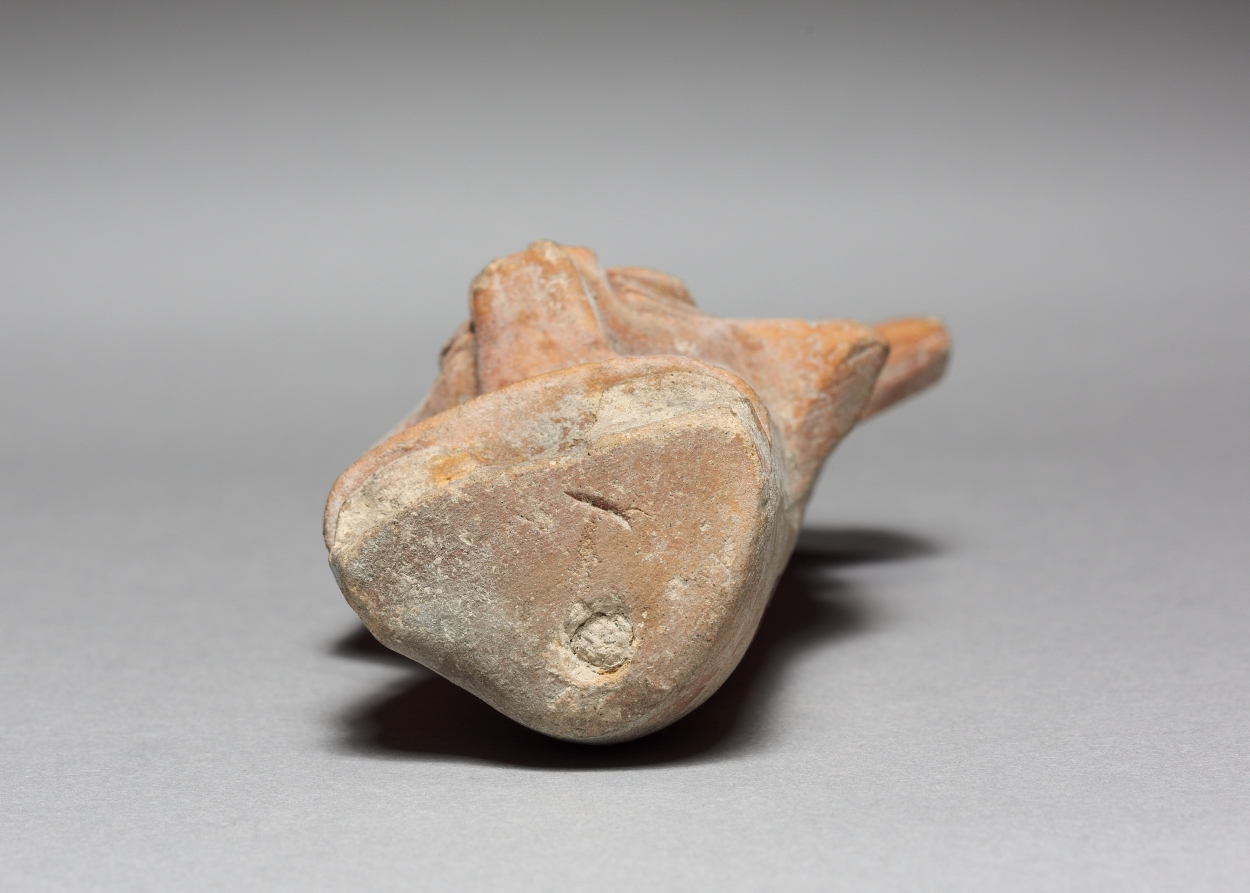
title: Mother-and-Child Figurine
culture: Mexico, Aztec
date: 1325–1521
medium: Ceramic, pigment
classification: Ceramic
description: The hair of this hollow, mold-made, female figurine was originally arranged in two projections atop the head. She carries an identical, small figure interpreted as a child; the figurine may be a metaphor for generational continuity.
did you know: This mother-and-child figurine may be a metaphor for generational continuity.